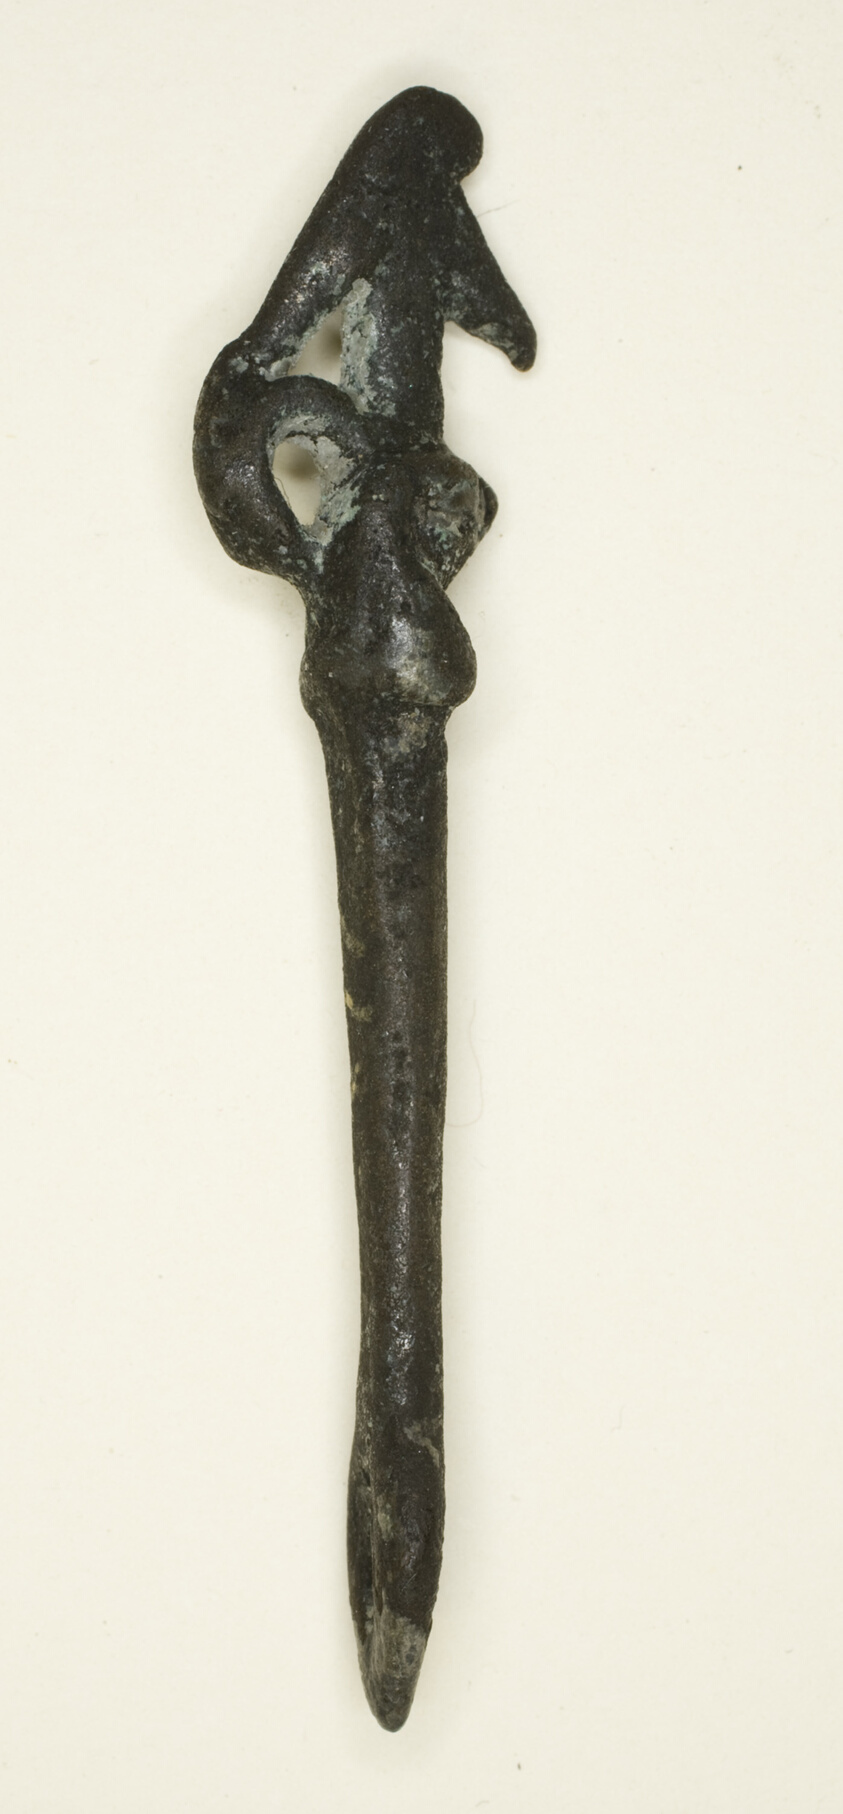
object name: Costume and Accessories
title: Amulet of the Harpoon of Horus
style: egyptian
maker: Egyptian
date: Third Intermediate–Late Period (about 1070–332 BCE)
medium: Bronze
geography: Egypt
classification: amulet; jewelry; bronze; metal; ancient art; costume